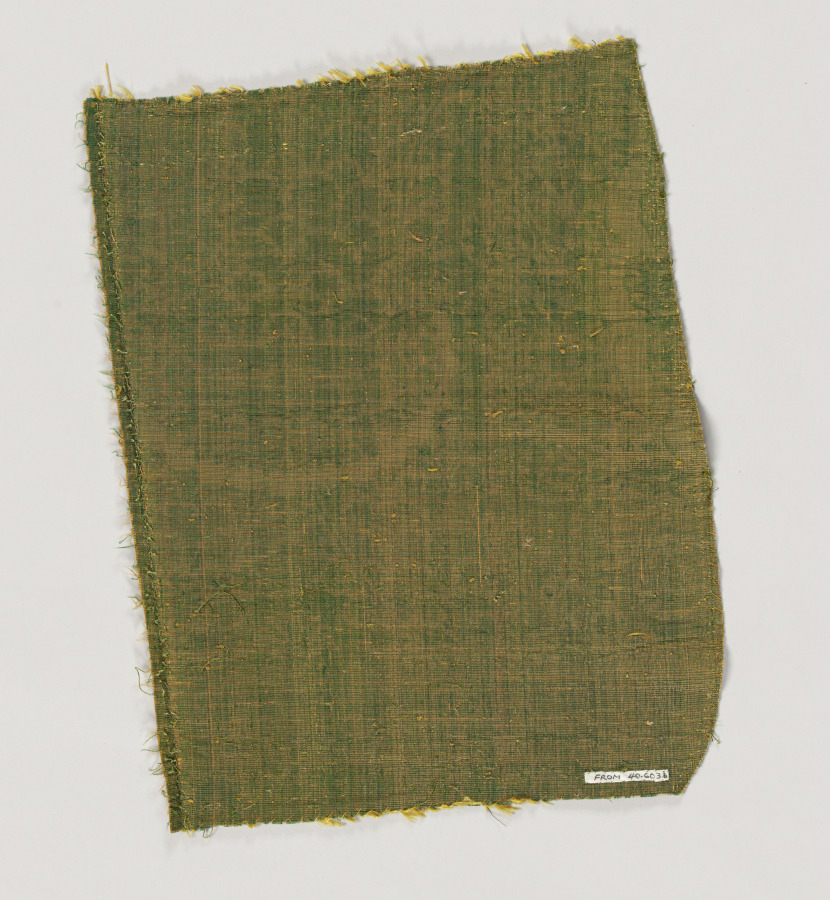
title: Velvet Fragments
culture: Spain, early 16th century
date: early 16th century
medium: velvet (cut, voided, and brocaded): silk and gold thread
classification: Velvet